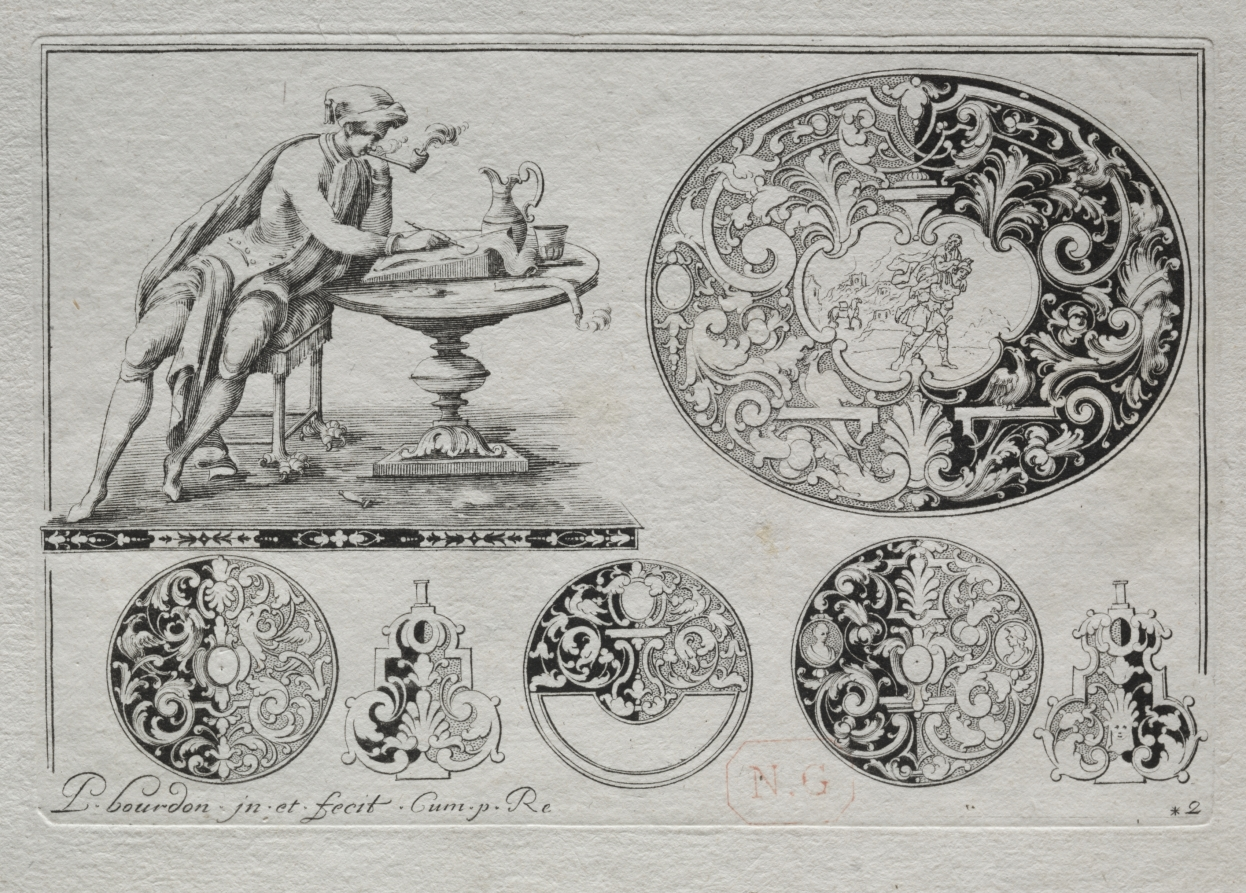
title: # 2 From " Livre second Cesais de Graubre " Second book of Engraved Design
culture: France, 18th century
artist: Pierre Bourdon (French)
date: c. 1703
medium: etching and engraving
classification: Print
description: The title page for this set of prints suggests that Bourdon’s designs are “useful for clockmakers, goldsmiths, chiselers, engravers, and other people.” These craftsmen who made ornamented objects sometimes consulted printed designs for inspiration. However, pattern prints similar to Bourdon’s also catered to aristocrats and wealthy professionals who pursued knowledge about styles and artists as a form of entertainment.